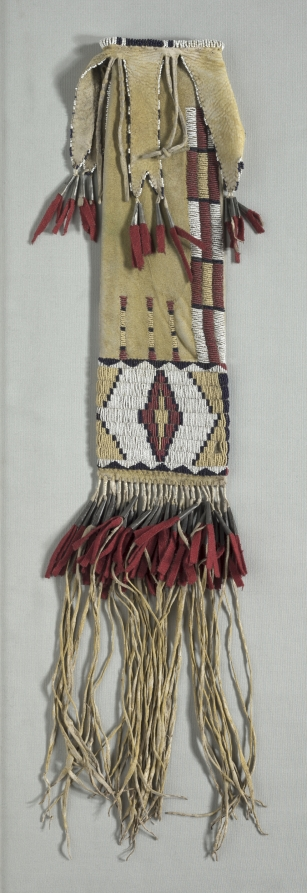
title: Pipe or Tobacco Bag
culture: Native North America, Plains, Tsitsistas (Cheyenne)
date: c. 1870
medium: Native-tanned hide, yellow pigment, glass beads, red trade cloth, tin cones, sinew thread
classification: Leather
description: The shape of this bag indicates it was made to hold tobacco and one of the pipes that played a paramount role in the lives of Plains nations. Smoking is a means of prayer—the smoke carries thanks and entreaties into the other-than-human realm—and pipes were lit to seek protection and guidance on new endeavors, during alliance and dispute negotiations, to mark life’s milestones, and in many other situations. By the late 1800s, when this example was made, such bags were a standard element of prestigious men’s formal dress regalia.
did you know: Glass and metal beads were imported from Europe.